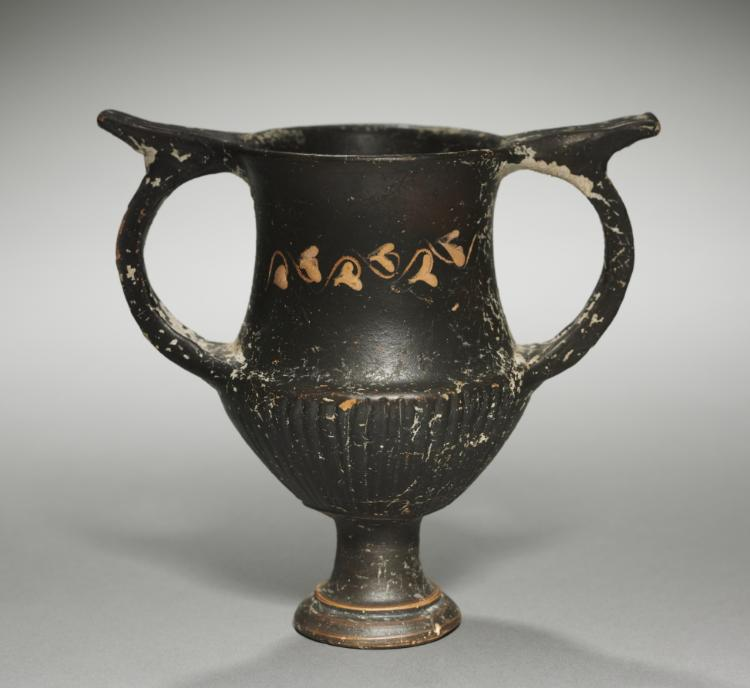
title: Black-Gloss Kantharos (Drinking Cup)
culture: Greek, Attic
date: c. 300–275 BCE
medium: ceramic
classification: Ceramic